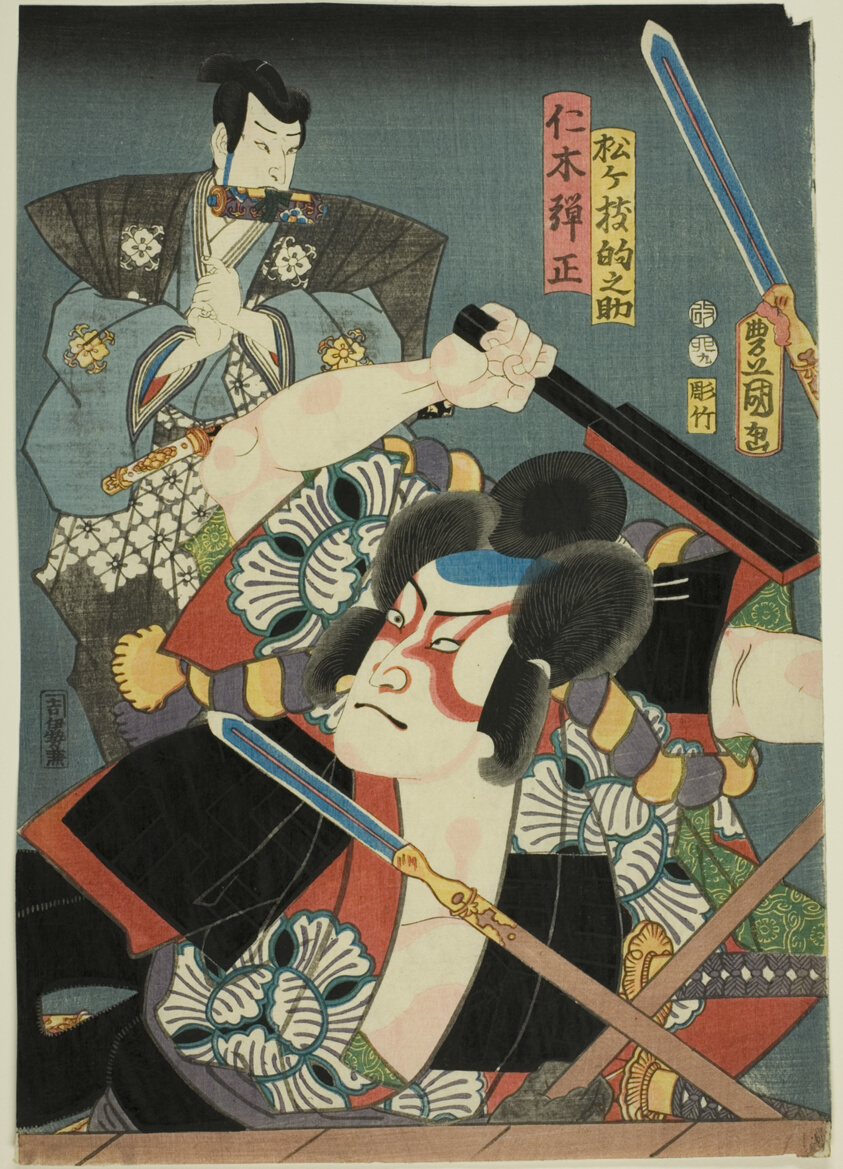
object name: Print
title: The actors Nakamura Fukusuke I as Matsugae Matonosuke and Ichikawa Komazo VII as Nikki Danjo in the play "Konoshita Kage Masago no Datezome," performed at the Ichimura Theater in the ninth month, 1855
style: Japanese (culture or style)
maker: Utagawa Kunisada I (Toyokuni III) (Japanese, 1786-1864)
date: 1855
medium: Color woodblock print; oban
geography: Japan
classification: woodblock print; print; asian art